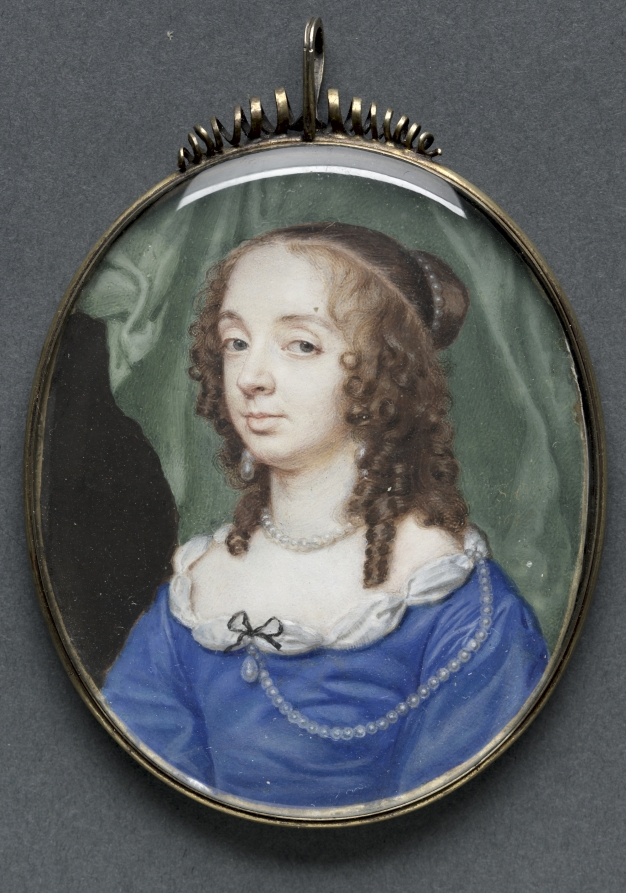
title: Portrait of a Woman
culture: England, 17th century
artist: Samuel Cooper (British, 1608/09–1672)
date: 1646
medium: watercolor on vellum with gold border in a silver gilt frame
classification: Portrait Miniature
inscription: signed right: S.C. / 1646.